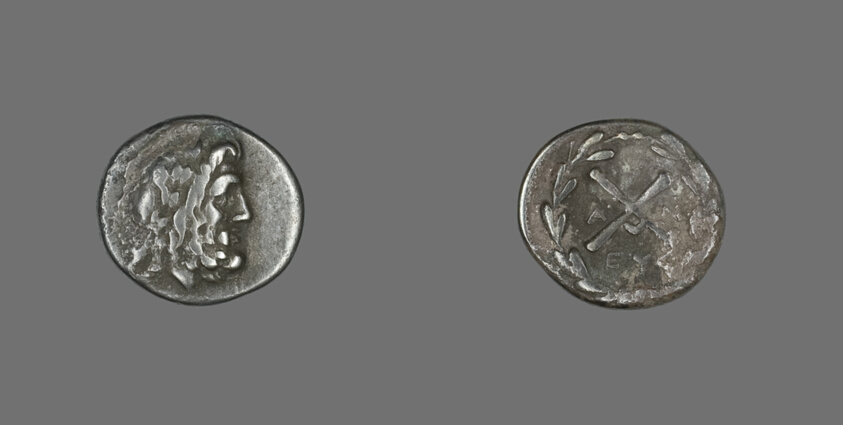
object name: Coin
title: Hemidrachm (Coin) Depicting the God Zeus Amarios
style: greek, ancient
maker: Greek; Antigoneia (once Mantineia)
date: 222-146 BCE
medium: Silver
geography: Ancient Greece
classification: coin; ancient art